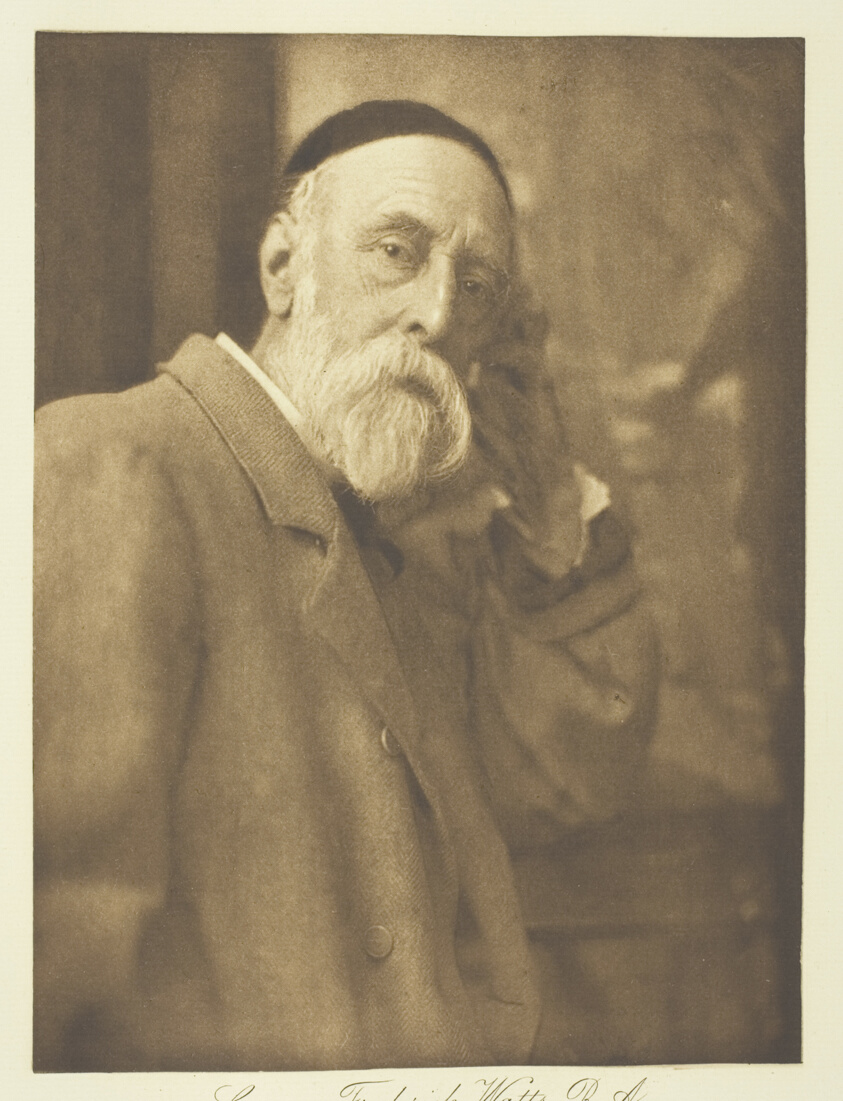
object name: Photograph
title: George Frederick Watts, R.A.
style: 19th century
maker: Henry Herschel Hay Cameron (English, 1852–1911); after George Frederick Watts (English, 1817–1904)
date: c. 1893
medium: Photogravure, plate 15 from the album "Lord Tennyson and his Friends" (1893)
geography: England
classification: photogravure; photomechanical process; photography; photograph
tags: Collected by Hugh Edwards, Lord Tennyson and His Friends